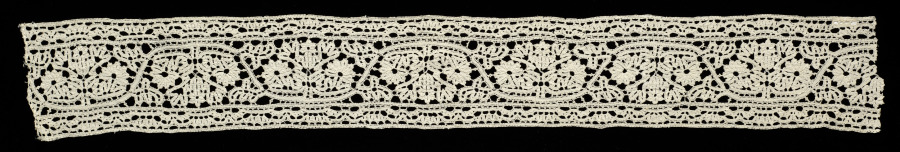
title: Lace Insertion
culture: Italy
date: 1600s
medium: Bobbin lace (tape lace)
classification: Lace